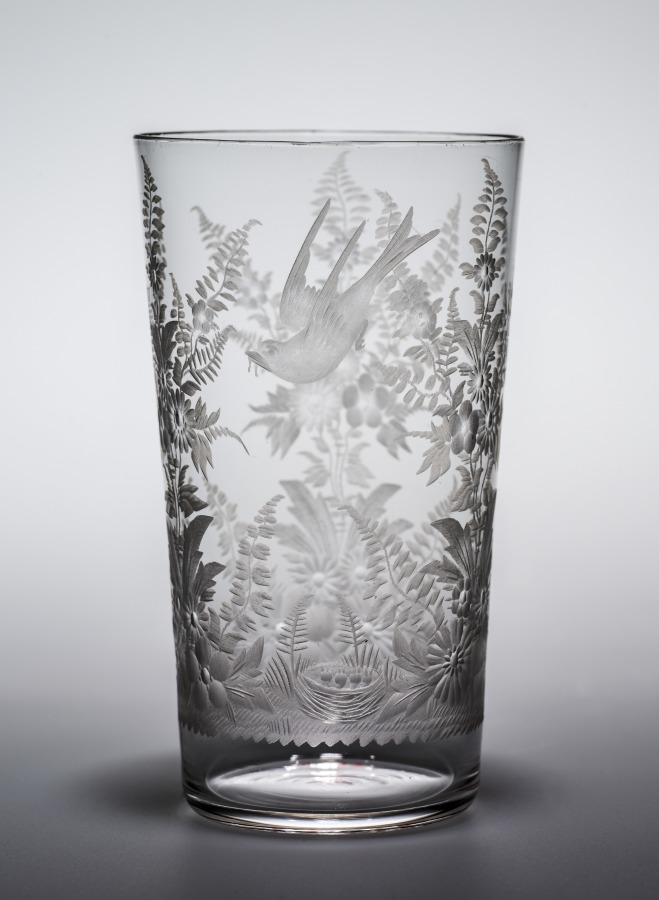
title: Tumbler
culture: America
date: 1850–1899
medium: glass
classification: Glass